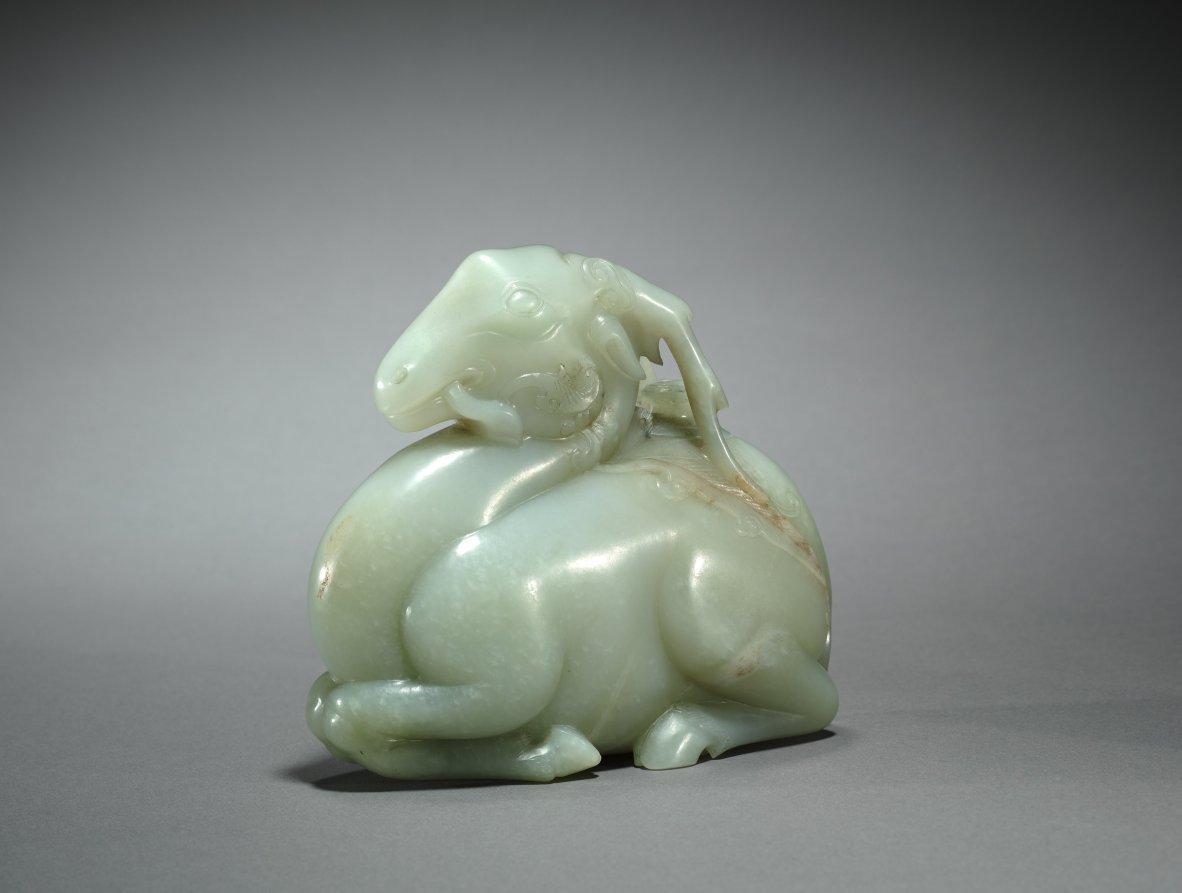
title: Jade Recumbent Deer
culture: China, Qing dynasty (1644–1911)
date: 1700s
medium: pale gray-green jade with brown markings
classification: Jade